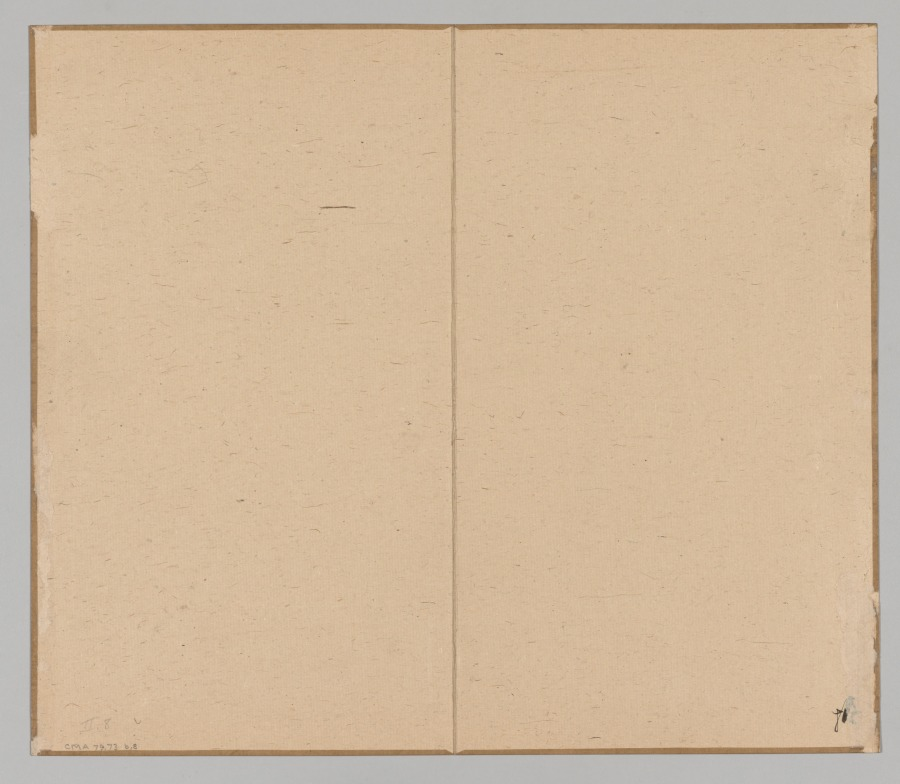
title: Reverberations of Taiga, Volume 2 (leaf 8)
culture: Japan, Edo period (1615–1868)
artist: Aoki Shukuya (Japanese, d. 1802)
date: mid- to late 1700s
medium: double-leaf from a pair of albums; ink and light color on paper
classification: Portfolio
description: Traditionally, young painters in Japan began their studies with an established master-painter. The master's compositions invariably became models that the apprentice copied to learn various ink and brush techniques. Shukuya was a pupil of the famous Kyoto artist Ikeno Taiga, whose style is reflected in these sketches of rocks, trees, and mountains.